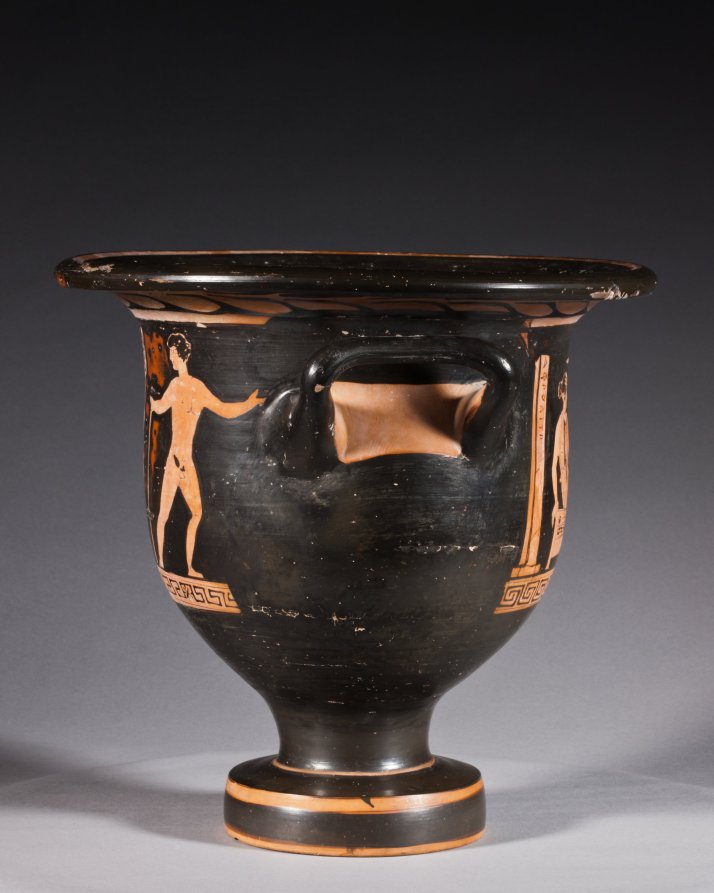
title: Red-Figure Bell Krater (Mixing Vessel): Aphrodite and Eros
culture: South Italian, Apulian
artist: attributed to Graz Painter (South Italian, Apulian, active c. 380–360 BCE)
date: c. 370–360 BCE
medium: ceramic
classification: Ceramic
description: This small mixing vessel shows a finely dressed woman seated on a chest and holding up a mirror to admire herself. Before her stands Eros, the winged god of love, holding a ribbon or sash. Behind the woman stands a pillar with the inscription ΑΦΡΟΔΙΤΗ, or APHRODITE, the goddess of love. Such labels are rare on vases, and scholars debate whether this names the woman shown as Aphrodite herself, with her son Eros, or a bride envisioning herself as Aphrodite, just before her wedding.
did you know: The dancing nude youths on the reverse are unusual; typically they would be standing and draped.